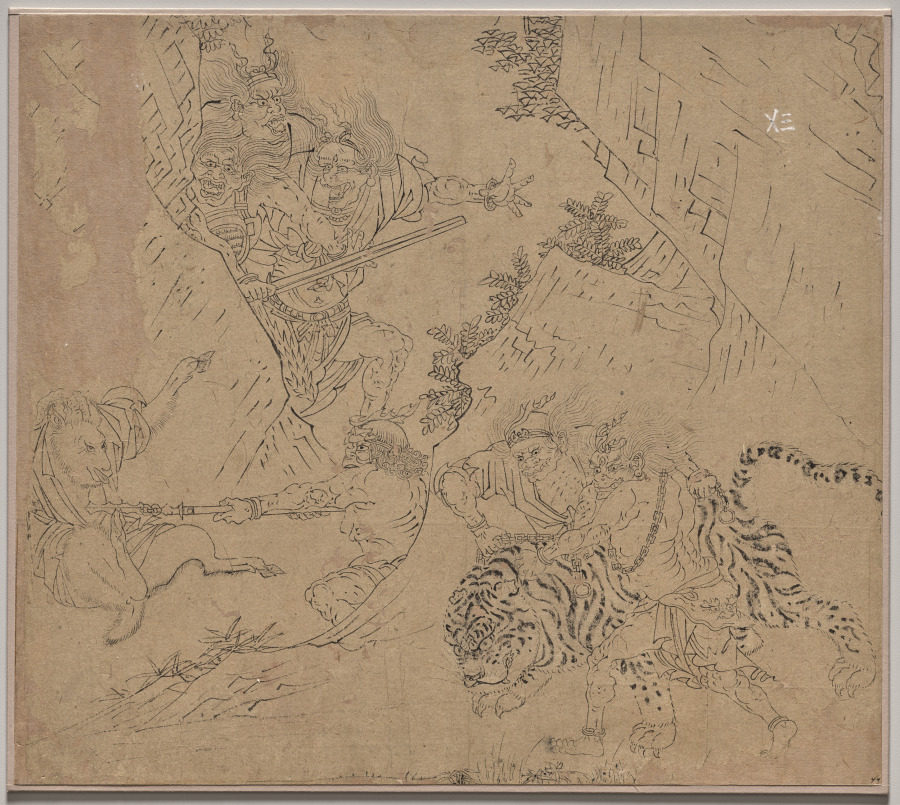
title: Album of Daoist and Buddhist Themes: Search the Mountain: Leaf 43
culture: China, Southern Song dynasty (1127-1279)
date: 1200s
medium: Album, ink on paper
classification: Painting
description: This leaf and the one nearby belongs to a group of sketches with the theme “Clearing the Mountains” (soushan tu). The textual basis has long been lost; only the paintings survive. Here, fearsome divine soldiers fight against evil spirits depicted as animals and human-like creatures in mountains and forests. At the lower left, a soldier attacks a ram. To the right, two soldiers attempt to subdue a tiger. Three soldiers (one wielding a sword) emerge from an opening in the cliffs.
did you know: Soldiers charging through crevices confront a ram with a spear and put a tiger in chains.